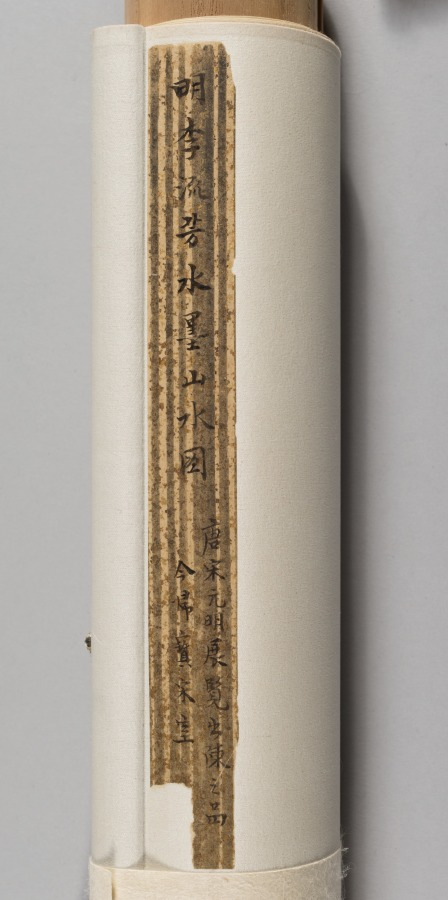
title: Thin Forest and Distant Mountains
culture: China, Ming dynasty (1368–1644)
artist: Li Liufang (Chinese, 1575–1629)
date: 1628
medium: hanging scroll, ink on paper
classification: Painting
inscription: Artist's inscription, signature, and 2 seals: Thin forest and distant mountains have always attracted me; As if they were from the brush and ink of Ni Tsan, left behind by the master in this mortal world. Now that the quiet recluse has chosen to live in the South of the City. He paints the spring breeze---over a curve of the river. In the spring day of the wu-ch'en year [1628] I made this painting and attached an old poem. Li Liu-fang [seals] Li Liu-fang-yin; Chang-heng shih. trans. WKH 1 additional seal of Chung Wen-ming (17th c.).